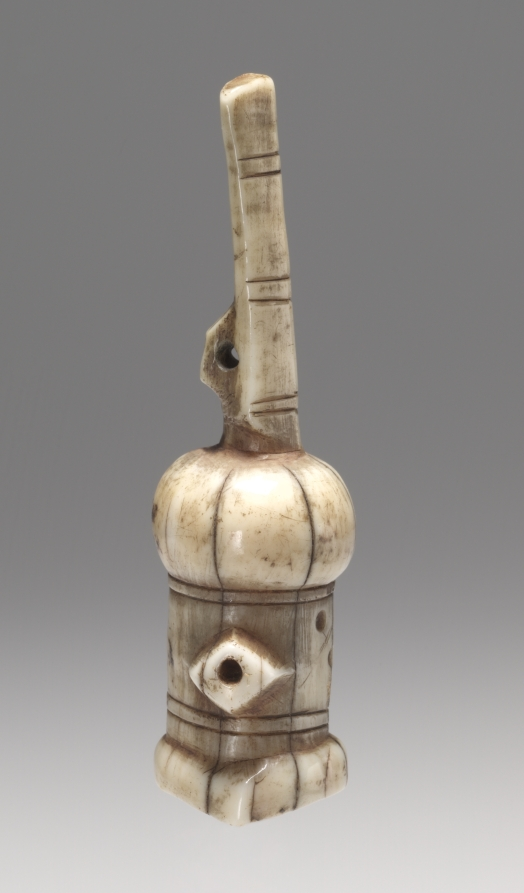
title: Whistle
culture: Central Africa, Democratic Republic of Congo or Angola, Chokwe people, late 19th century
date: late 1800s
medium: Probably hippopotamus ivory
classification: Musical Instrument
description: Carved out of ivory or wood in a variety of shapes, Chokwe whistles often bear miniature, stylized renderings of masks. Cikunza, the "patron saint" of the boys' initiation into manhood, is depicted with a pointed extension imitating the horn of a road antelope, symbolizing the fertility spirit. Typically such whistles were used by men during the hunt to communicate with their co-hunters and to call their dogs. They were either worn attached to a string as a necklace or tied to a spear.